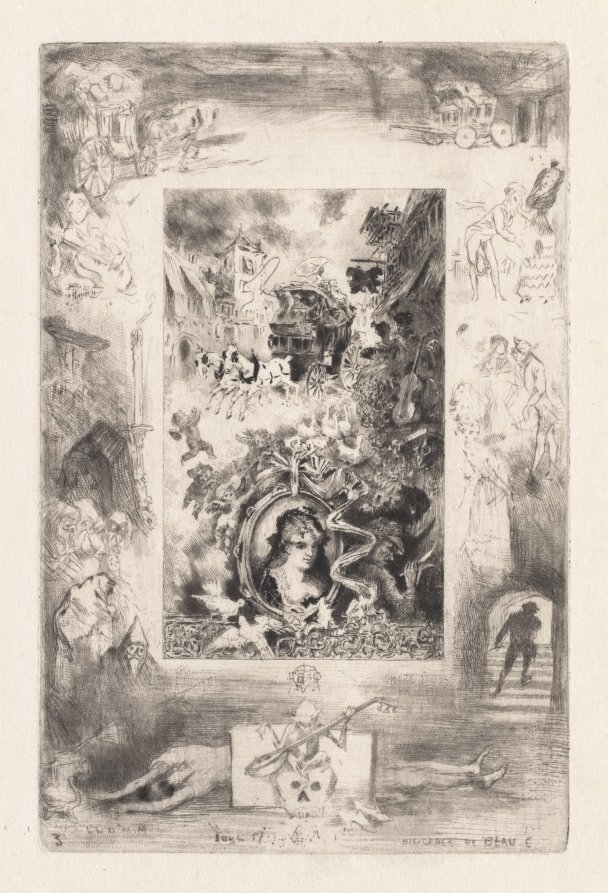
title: Letters from My Windmill:The Diligence of Beaucaire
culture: France, 19th century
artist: Félix Hilaire Buhot (French, 1847–1898)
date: 1880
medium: drypoint, roulette and aquatint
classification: Print